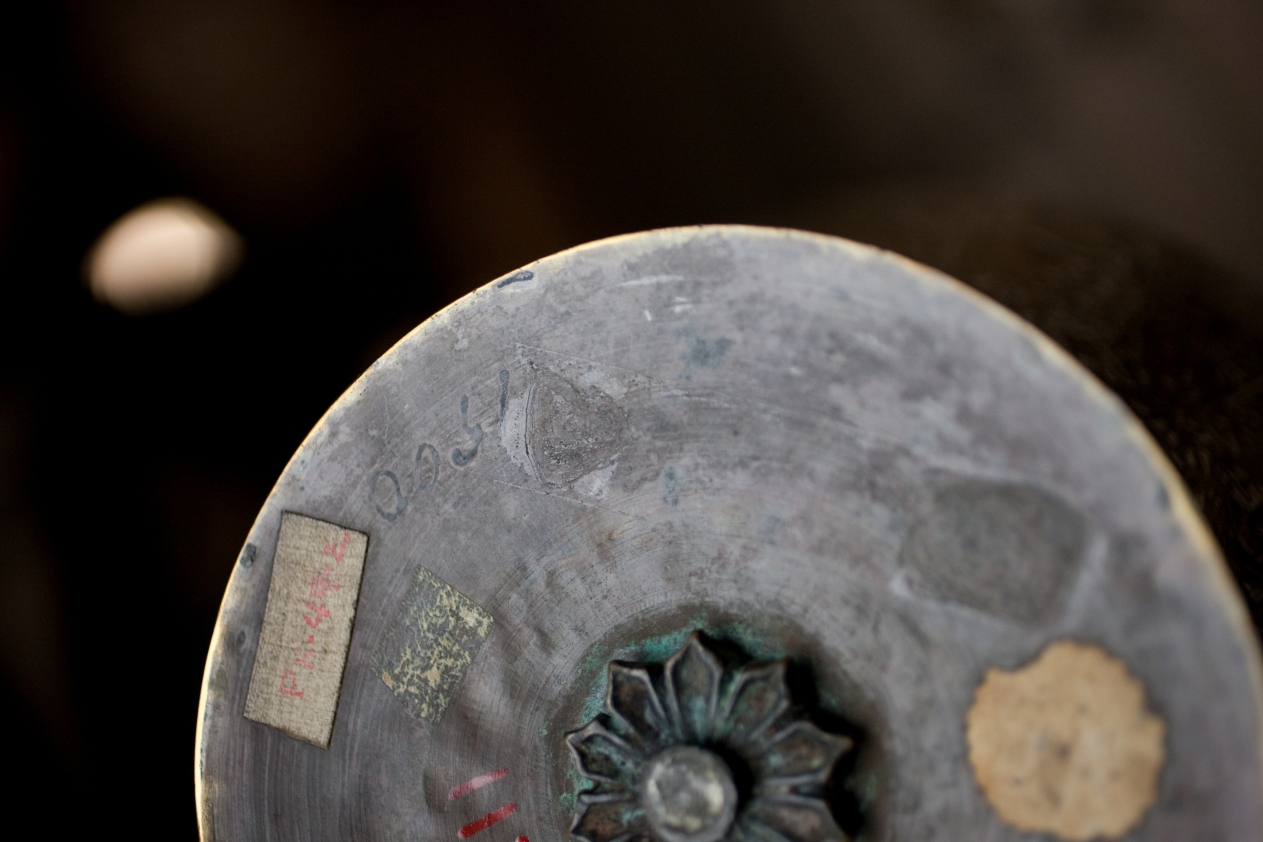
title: Luxury Ewer Extending Good Fortune to the Owner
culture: Iraq, possibly Mosul, Zangid or Artugid Period, 13th Century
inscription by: Ahmad al-Dhaki al-Mawsili (Iraqi, Mosul, active early 1200s?)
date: 1223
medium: brass inlaid with silver; lid and base added later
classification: Metalwork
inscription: Band on the neck (naskh): "Work of Ahmad al-Thaki, the engraver, al-Mawsili, in the year 620 and glory to my owner"; band at the base of the handle (naskh): "Work of Ahmad al-Thaki al-Mawsili"; graffiti of later owners, roughly scratched into the neck of the ewer: "Husayn ibn Qasim"; "Usta al-Muhtasib [?]"; band on the shoulder of the ewer (plaited, animated kufic): "Good luck, and learning, and commanding respect, and prosperity, and pride, and generosity, and faithfulness, and affection, and glory, and survival, and justice, and blessings, and exaltedness, and prosperity, and everlasting peace, and charitable giving."; band on the foot (naskh) [foot is a later addition]; this inscription has not yet been deciphered.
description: This silver inlaid ewer was produced for luxury clientele. The wide band around the body of the vessel displays vignettes of daily and courtly life contained within multilobed medallions. Some of the scenes feature falconry, hunting, dancing, and several groups of musicians. All these scenes are set off against a skillfully executed arabesque background—a pervasive motif in Islamic art characterized by interwoven vegetal and curvilinear elements. An inscription around the ewer’s shoulder extends good fortune, prosperity, and peace to the owner. The ewer is dated 1223 and signed by the master craftsman Ahmad al-Dhaki of Mosul.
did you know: Later owners roughly scratched their names into the neck of the ewer.